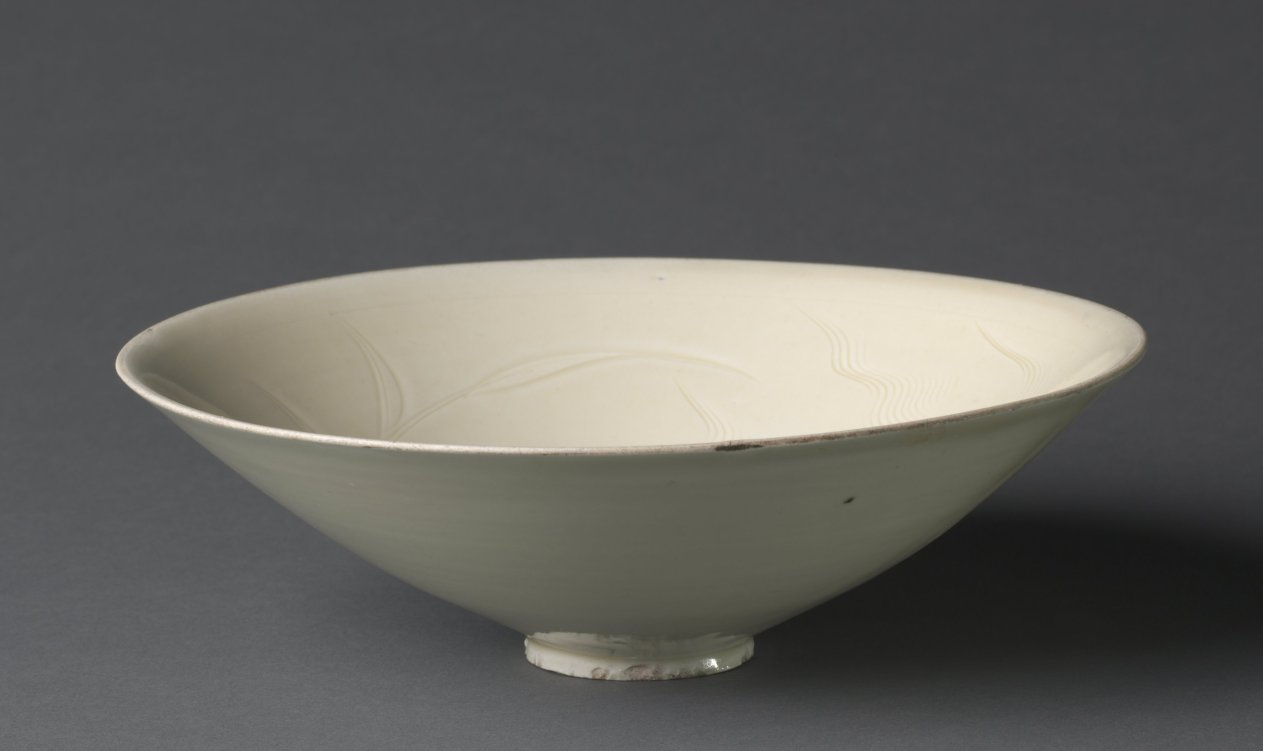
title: Bowl with Ducks among Waves and Reeds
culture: China, Hebei province, Quyang, Northern Song dynasty (960-1127)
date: 1100s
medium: cream-glazed porcelain with incised decoration, Ding ware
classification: Ceramic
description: Delicacy and refinement, combined with simplicity of shape, make Ding ware particularly attractive. The best pieces were selected by the Northern Song court for imperial use. The white, thin body is covered with a transparent ivory glaze that occasionally runs down toward the foot, forming streaks or drops called "tear-stains" by the Chinese connoisseurs. As the vessel was fired upside down, the rim was unglazed and could be bound with a metal band, such as copper or precious silver and gold.